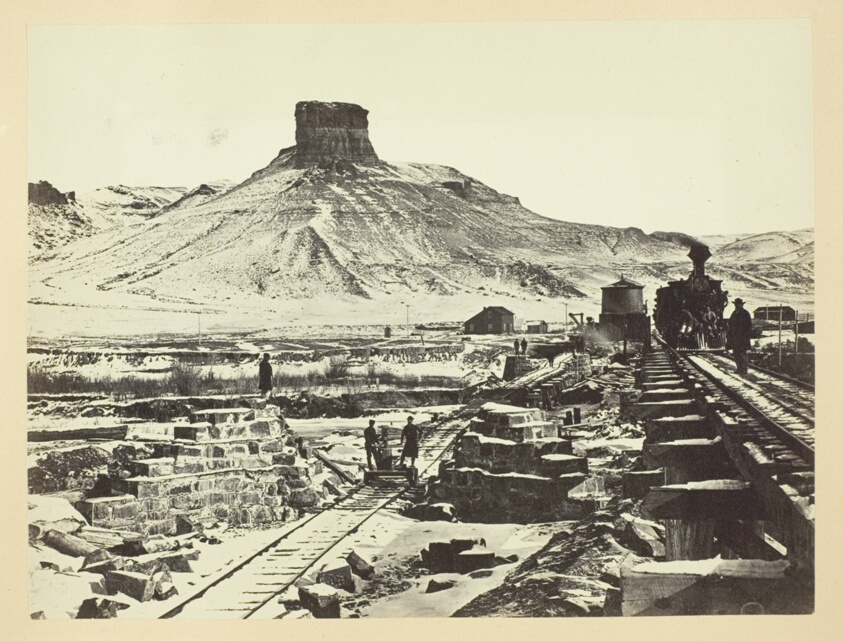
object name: Photograph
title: Citadel Rock, Green River Valley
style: 19th century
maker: Andrew J. Russell; American, 1830–1902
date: 1868/69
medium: Albumen print, pl. XI from the album "Sun Pictures of Rocky Mountain Scenery" (1870)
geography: United States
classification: photograph; albumen silver print; photography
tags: Collected by Hugh Edwards, landscapes